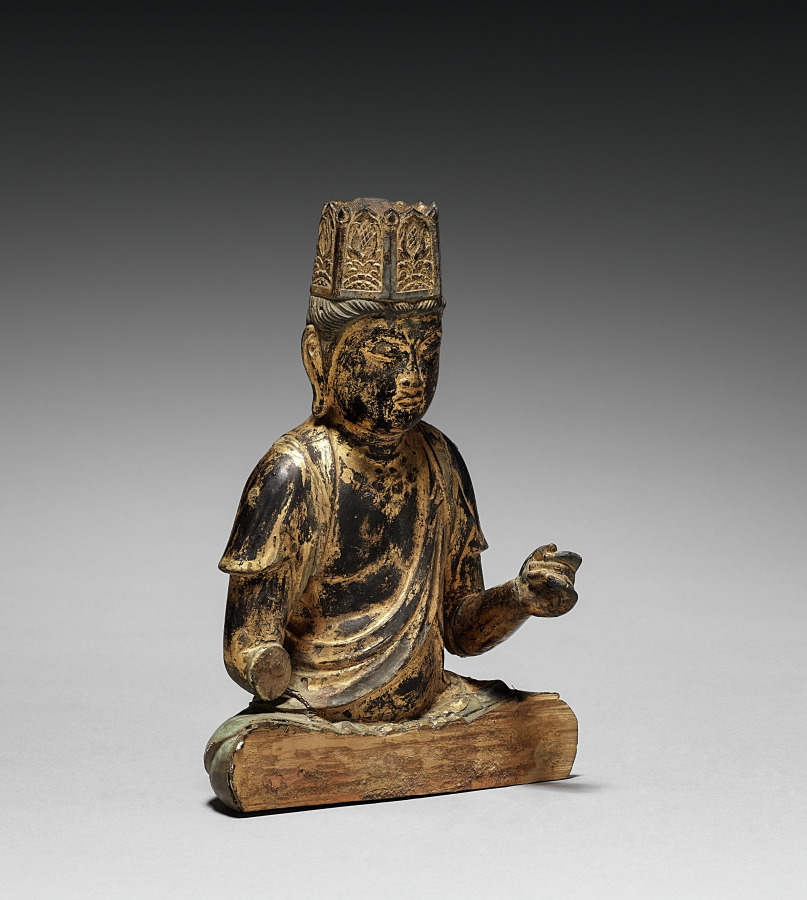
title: Bodhisattva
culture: Japan, Heian period (794–1185)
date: 900s–1100s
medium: gilded wood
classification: Sculpture